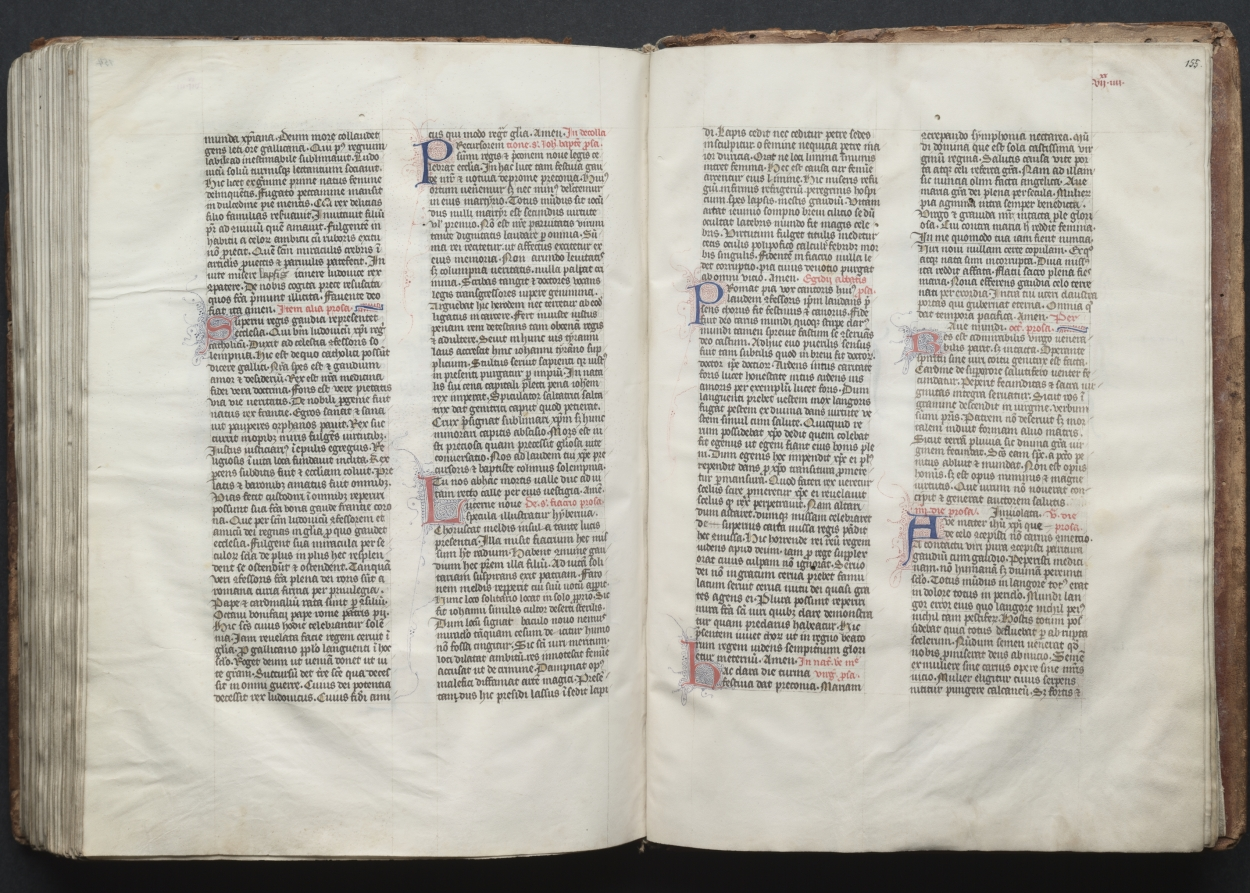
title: The Gotha Missal: Fol. 155r, Text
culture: France, Paris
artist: Master of the Boqueteaux (French)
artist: and Workshop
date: c. 1375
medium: ink, tempera, and gold on vellum; blind-tooled leather binding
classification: Bound Volume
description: The style and quality of this manuscript's decoration is typical of deluxe Parisian books made for aristocratic or royal patrons. Most of the book's decoration appears to be the work of the Master of the Boqueteaux, an artist active at the court of King Charles V (died 1380). His style was apparently shared by a number of book illuminators working in and around Paris. It is very possible that the Gotha Missal belonged to Charles V, but is not provable because the manuscript has no royal portraits and lacks a colophon. Given the book's magnificent decoration, however, it would seem that it was produced for a Valois prince, if not for the king himself. The manuscript receives its name from the German dukes of Gotha, its later owners.